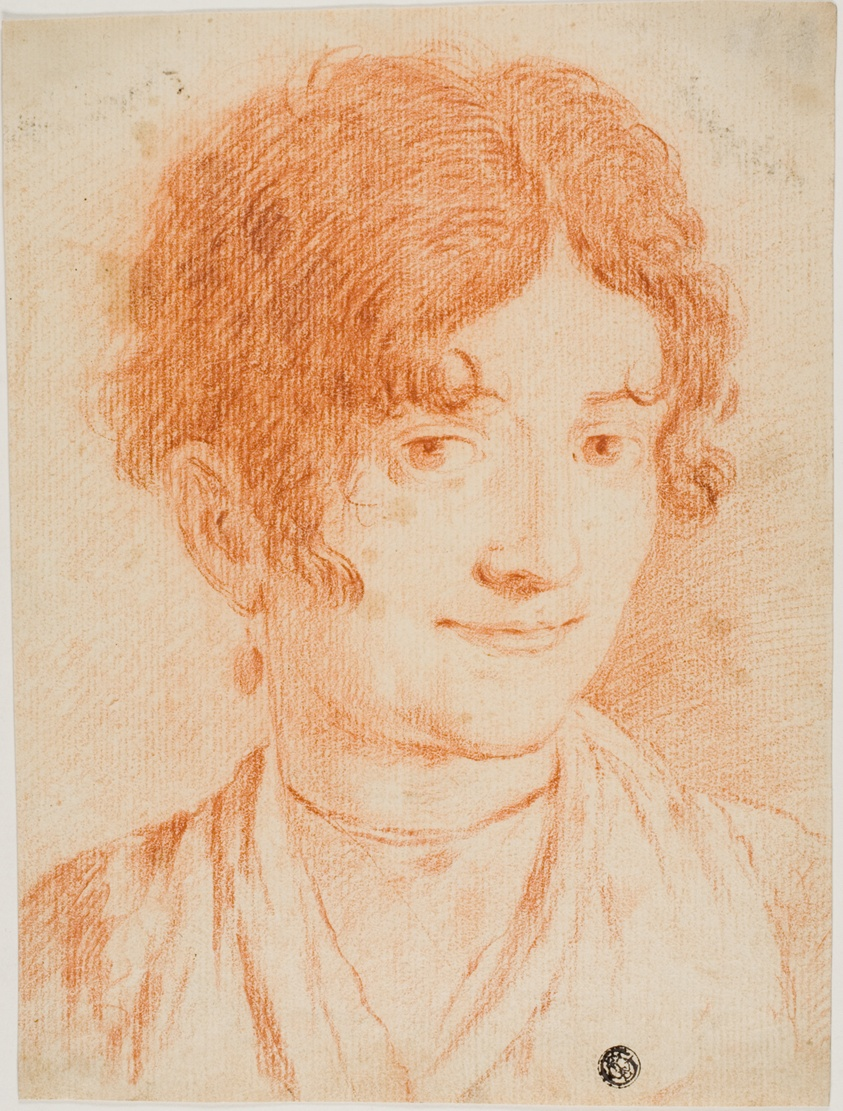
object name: Drawing and Watercolor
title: Head of a Woman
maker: Unknown Artist; French, n.d.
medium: Red chalk, on cream wove paper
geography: France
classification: chalk; drawings (visual works); prints and drawing